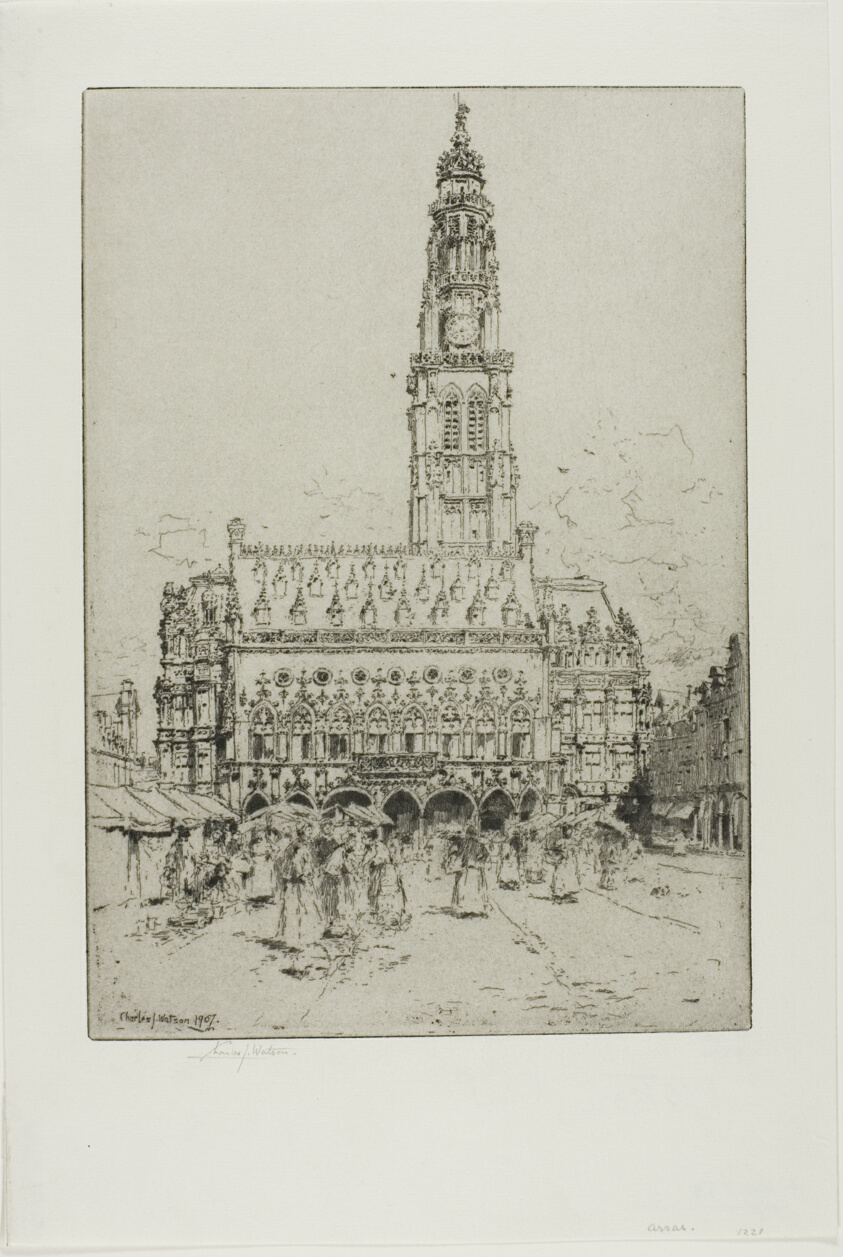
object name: Print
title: Arras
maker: Charles John Watson (English, 1846-1927)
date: 1907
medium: Etching in black on cream wove paper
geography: England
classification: etching; print; prints and drawing